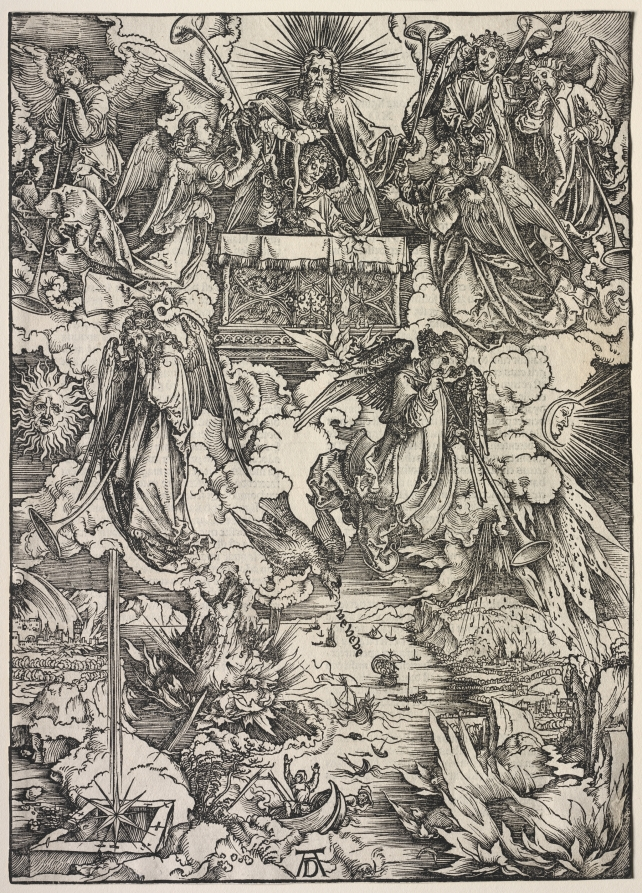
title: Revelation of St. John: Seven Angels with Trumpets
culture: Germany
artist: Albrecht Dürer (German, 1471–1528)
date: 1511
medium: woodcut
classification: Print